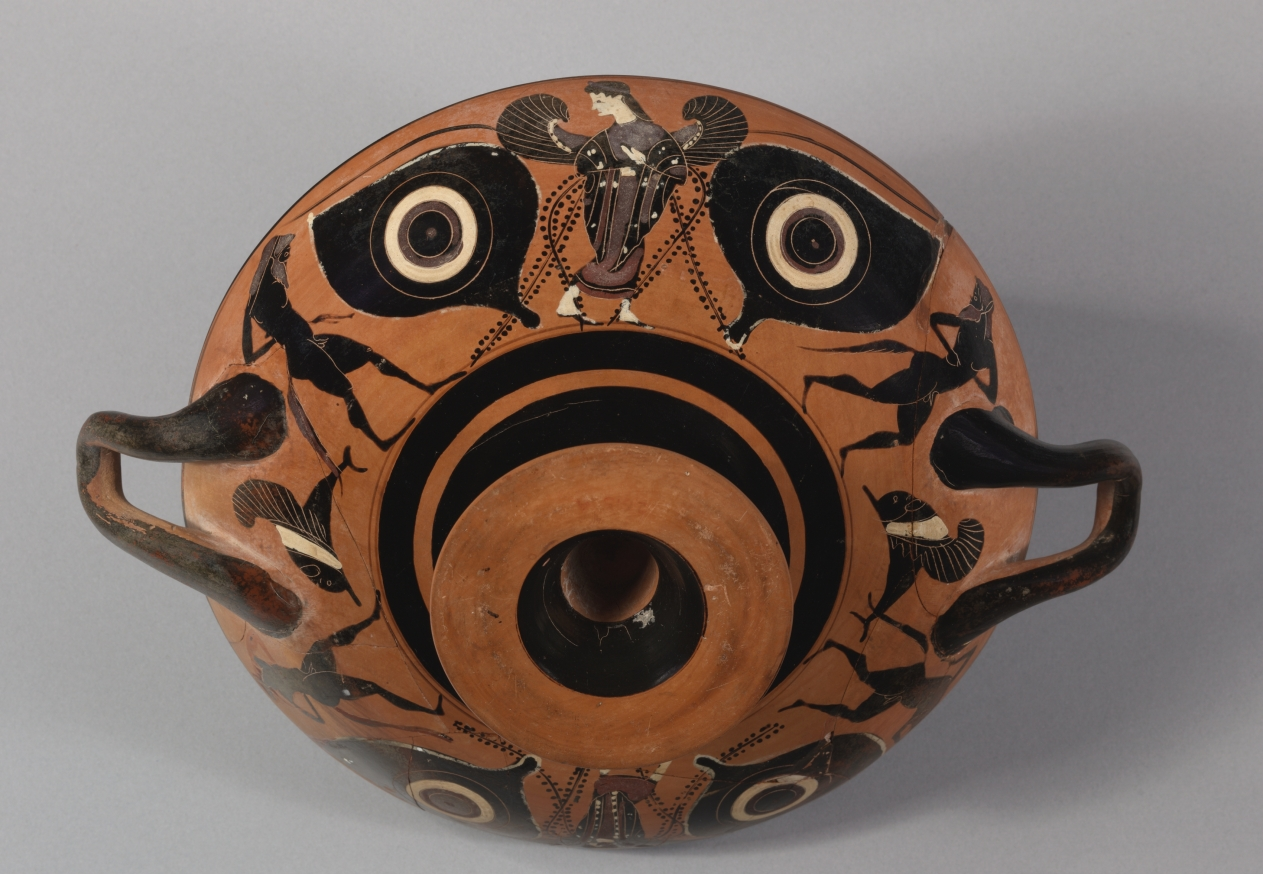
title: Black-Figure Eye Cup: Iris and Satyrs (A, B); Gorgoneion (I)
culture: Greek, Attic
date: c. 520–510 BCE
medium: ceramic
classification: Ceramic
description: Along with two large sets of eyes on its exterior, this drinking vessel also features other figures: a winged female, probably Iris, between each pair of eyes, and pairs of satyrs flanking them; a winged dolphin beneath each handle; and a frontal Gorgoneion, or face of Medusa, baring her teeth and tongue within the tondo. Although the eyes and Gorgoneion may serve to ward off evil, they also make for fluid identities while drinking, inviting drinkers to enter the mythical realm. For when tilting such cups to imbibe, drinkers confront monstrous beings while simultaneously masking their faces from others.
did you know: The eye cup takes its name from the large eyes on its exterior.